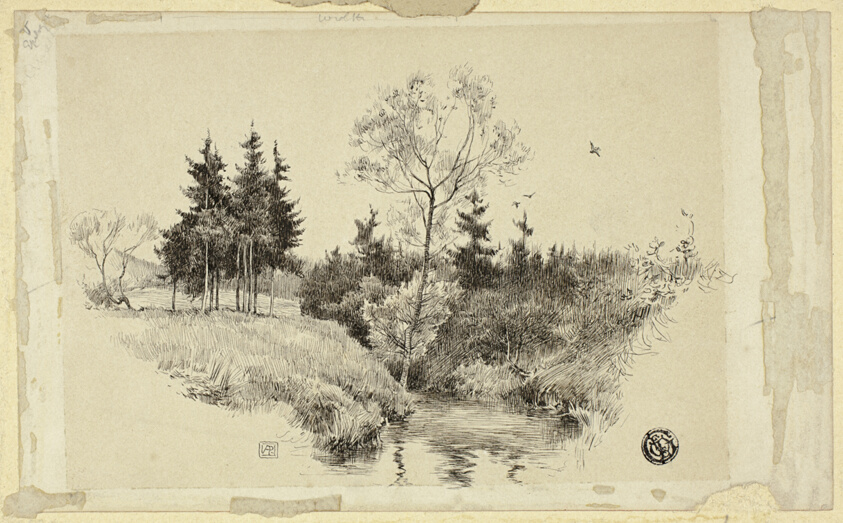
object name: Drawing and Watercolor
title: Brook in Forest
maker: Unknown artist (possibly 19th century)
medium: Pen and black ink on ivory wove paper (discolored to buff), laid down on tan wood-pulp board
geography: Unknown Place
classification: pen and ink drawings; drawings (visual works); prints and drawing